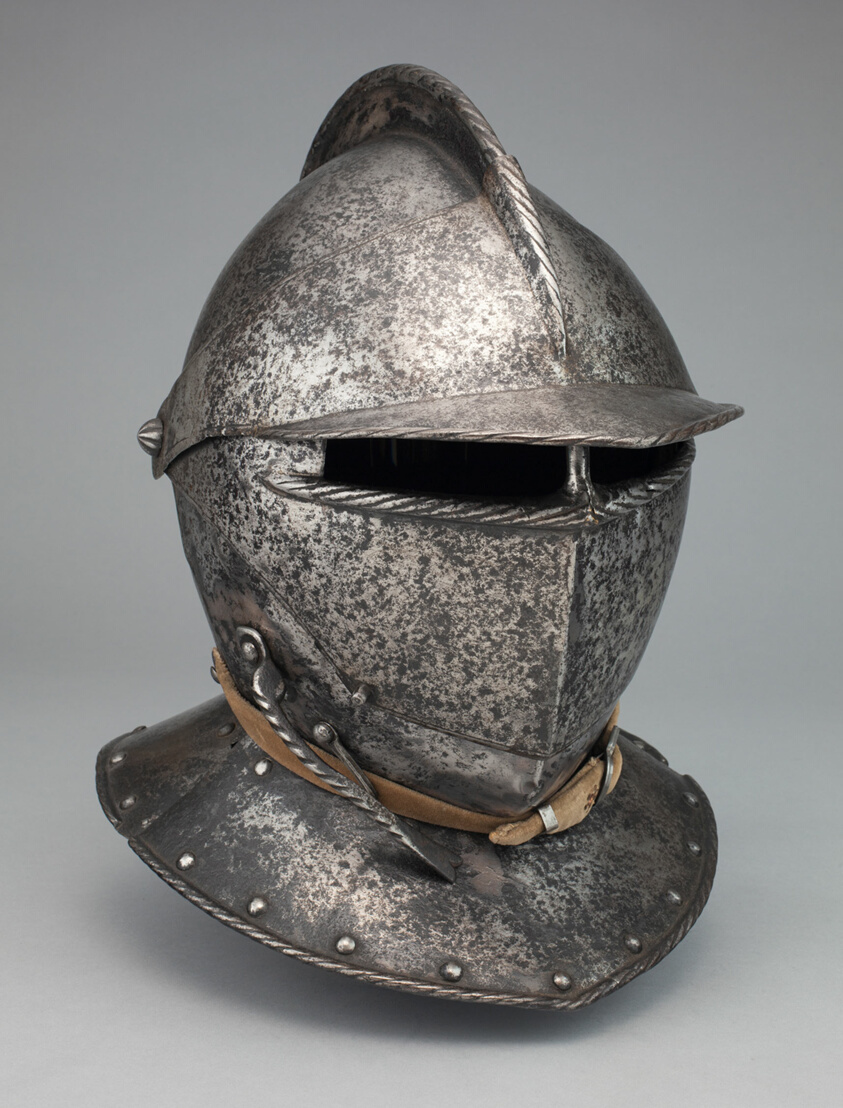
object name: Armor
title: Closed Burgonet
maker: Pierre du Coudroy (Flemish, born France, 1560-about 1626); Brussels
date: about 1610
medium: Steel, silver, and leather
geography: Brussels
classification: suit-helmet; armor; arms and armor